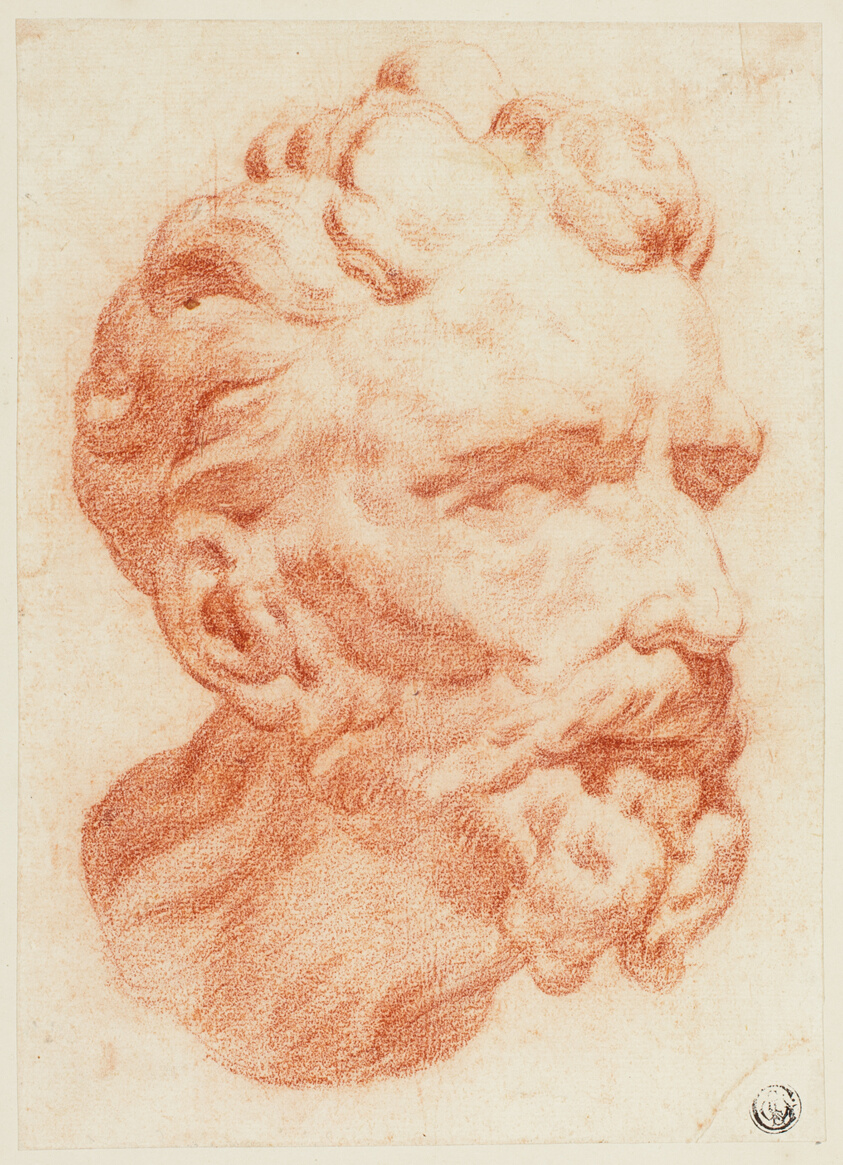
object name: Drawing and Watercolor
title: Head of Bearded Man in Three-Quarter Profile to Right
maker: Attributed to Pietro Dandini; Italian, 1646-1712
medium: Red chalk on ivory laid paper, laid down on board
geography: Italy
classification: chalk; drawings (visual works); prints and drawing